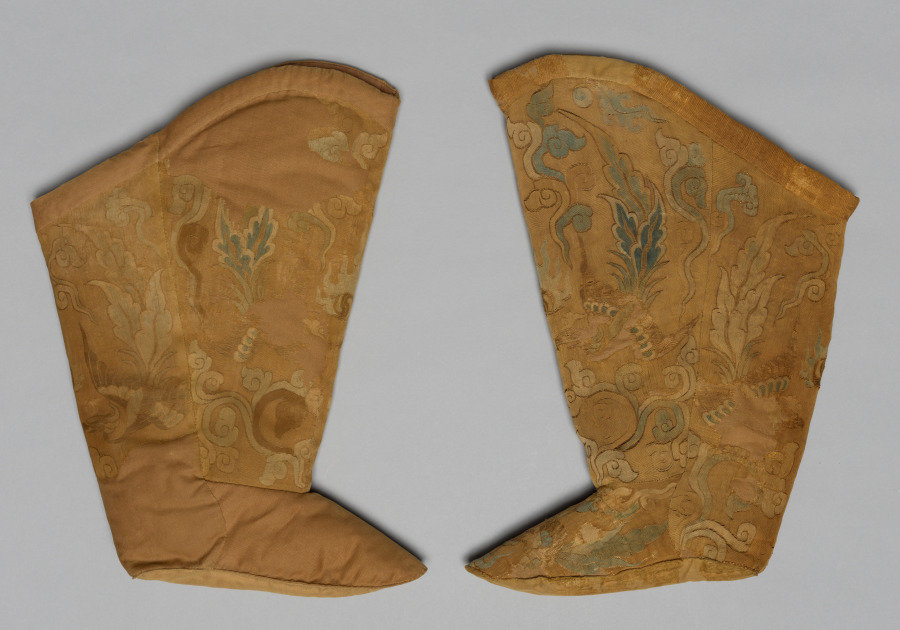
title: Pair of Boots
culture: Northern China, Liao dynasty (907-1125)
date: 907–1125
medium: Silk: tapestry weave; two kinds of metal threads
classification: Textile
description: This magnificent pair of boots, made of finely woven silk tapestry (kesi), features two phoenixes in flight chasing a flaming pearl. Although the bright colors of the fabric have become muted from being buried in a tomb and the gold threads are partly disintegrated, the once lavish use of gold and the Chinese-inspired phoenix motif suggest that the boots were made for a member of the Liao imperial family, probably a woman. At the time the boots were made in the Khitan-occupied territory in northern China, footbinding was introduced among upper-class women in southern China. The high value the Khitan people accorded to boots relates to their mobile, seminomadic lifestyle.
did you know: The boots have a complete padding and lining, but the soles do not show signs of being worn.